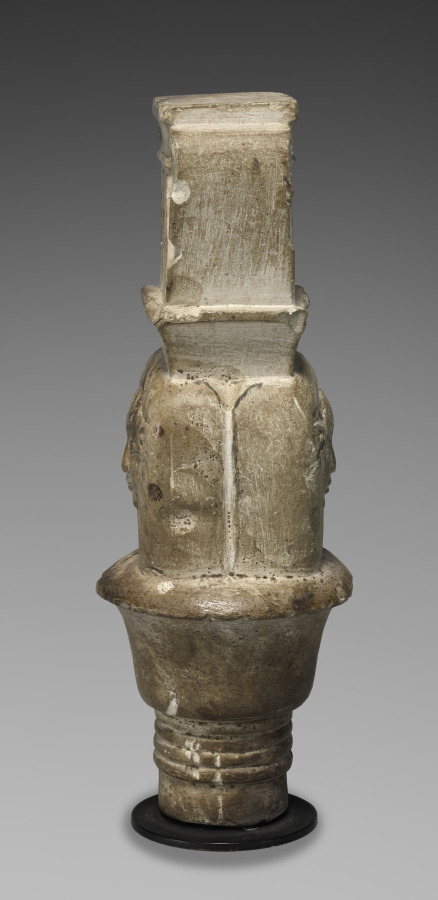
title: Votive Hathor Column Capital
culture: Egypt, Late period (715–332 BCE), Dynasty 30–Greco-Roman period (332 BCE–395 CE), Ptolemaic dynasty (305–30 BCE)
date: 380–30 BCE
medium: limestone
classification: Sculpture